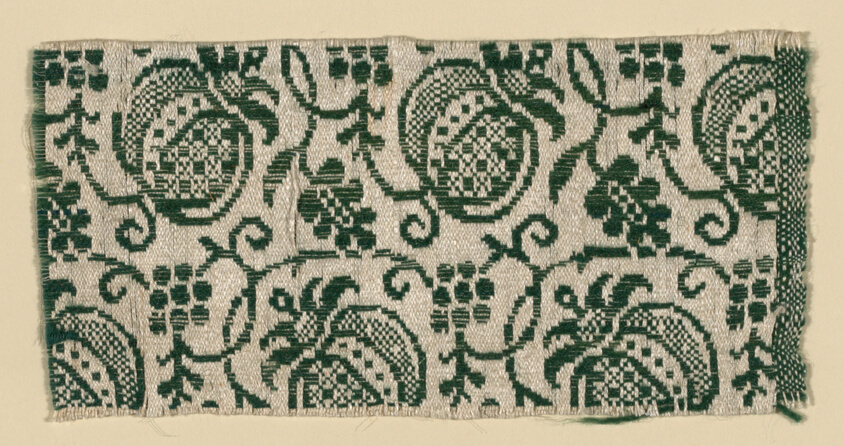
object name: Textile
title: Fragment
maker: Netherlands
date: 1650/1700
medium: Linen and wool, compound weave (i.e. Beiderwand or Lampas 2:1)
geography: Netherlands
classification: textile; weaving